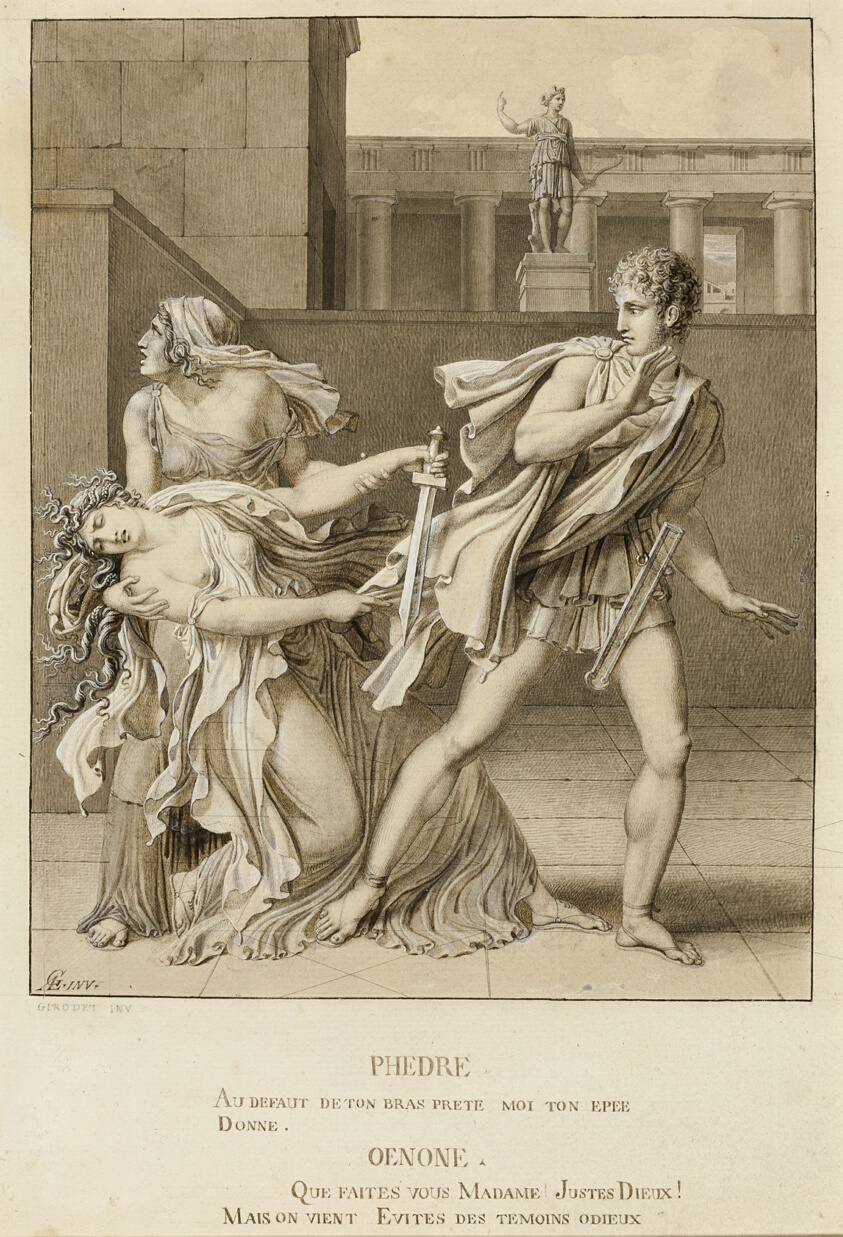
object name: Drawing and Watercolor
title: Phaedre, Having Declared Her Passion, Attempts to Kill Herself with the Sword of Hippolytus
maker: Anne-Louis Girodet de Roucy-Trioson; French, 1767-1824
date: c. 1801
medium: Pen and brush and black and brown wash and graphite, heightened with white gouache on cream laid paper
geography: France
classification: ink and wash; drawings (visual works); prints and drawing